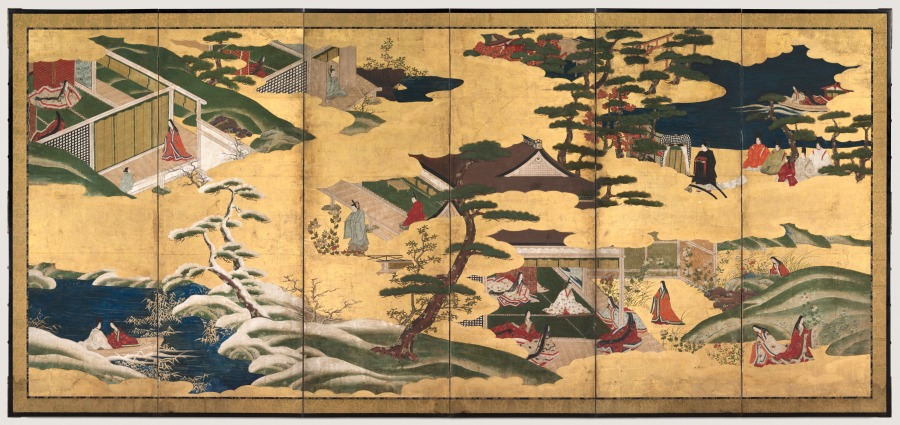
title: Scenes from the Tale of Genji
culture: Japan, Edo period (1615–1868)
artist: Tosa School (Japanese)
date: late 1700s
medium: One of a pair of six-panel folding screens; ink, color, and gold on gilded paper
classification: Painting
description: Folding screens served as temporary dividers in traditional Japanese open-plan architectural spaces. This pair was inspired by Japan’s most celebrated work of literature, the Tale of Genji, written by Murasaki Shikibu, an attendant to the empress in the early 11th-century imperial court. The novel follows the love life of the “Shining Prince” Genji and delves into the psychological states of his many companions. Distinct episodes are nestled within a matrix of golden clouds and landscape elements. Each screen includes six episodes presented in a nonlinear fashion, capturing scattered highlights of the story.